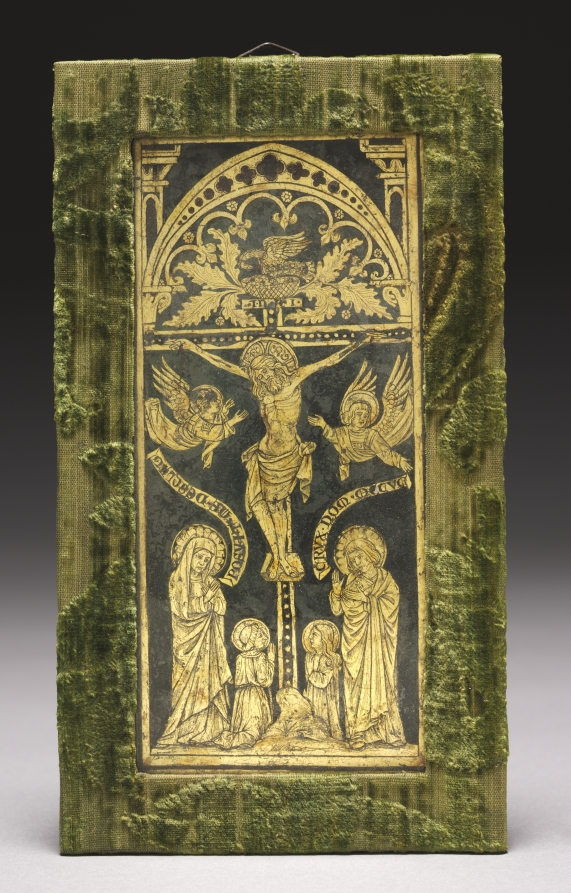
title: Plaque: The Crucifixion with Angels and Saints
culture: Northern Italy, Padua?, 15th century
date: c. 1400–1425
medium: verre églomisé (reverse gilded glass, engraved and painted)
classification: Glass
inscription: the letters on the banderoles may be described as a composite script called Gothic majuscule, which intermingles Roman capitals and uncial alphabets. This script was especially favored by Italian artists for inscriptions in architecture, sculpture, panel painting, and manuscript illustrations during the 14th and 15th centuries. The banderole on the left reads: "POSVIT. ME. DESOLAT.[UM]" (God has forsaken me); the other banderole reads: "CRUS. DOMINI. MECUM" (the cross of the Lord is with me). A third inscription with the abbreviations for the words of Pilate--"I. N. R. I." (IESUS, NASARENUS RES IUDAEORUM), or Jesus of Nazareth, the King of the Jews" appears on the plaque (tabula ansata) at the top of the cross.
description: Small glass plaques like this were often combined with plaques of painted wood and framed within elaborate architectural reliquaries or small altarpieces. The decorative technique, called verre églomisé, is a process in which the reverse side of a glass is gilded and then engraved with designs. The pelican, shown above the cross piercing its breast to feed its young, became a common symbol of Christ's sacrifice on the cross.